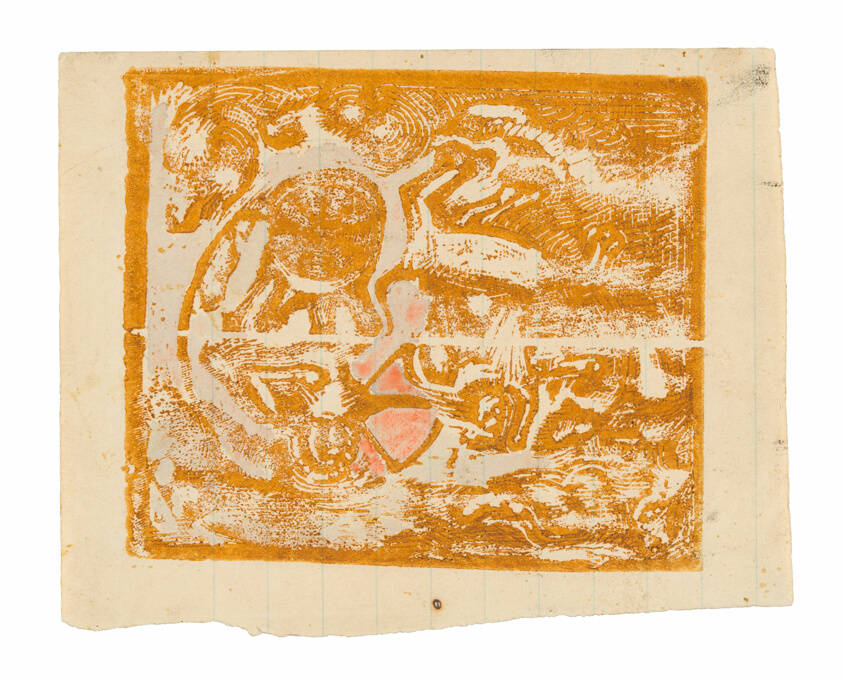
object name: Print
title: Maoris and Animals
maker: Paul Gauguin (French, 1848-1903)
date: 1896/97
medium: Wood-block print in yellow ocher ink with gray-blue watercolor and touches of red watercolor on cream wove notebook paper ruled in blue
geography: France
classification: woodcut; print; prints and drawing